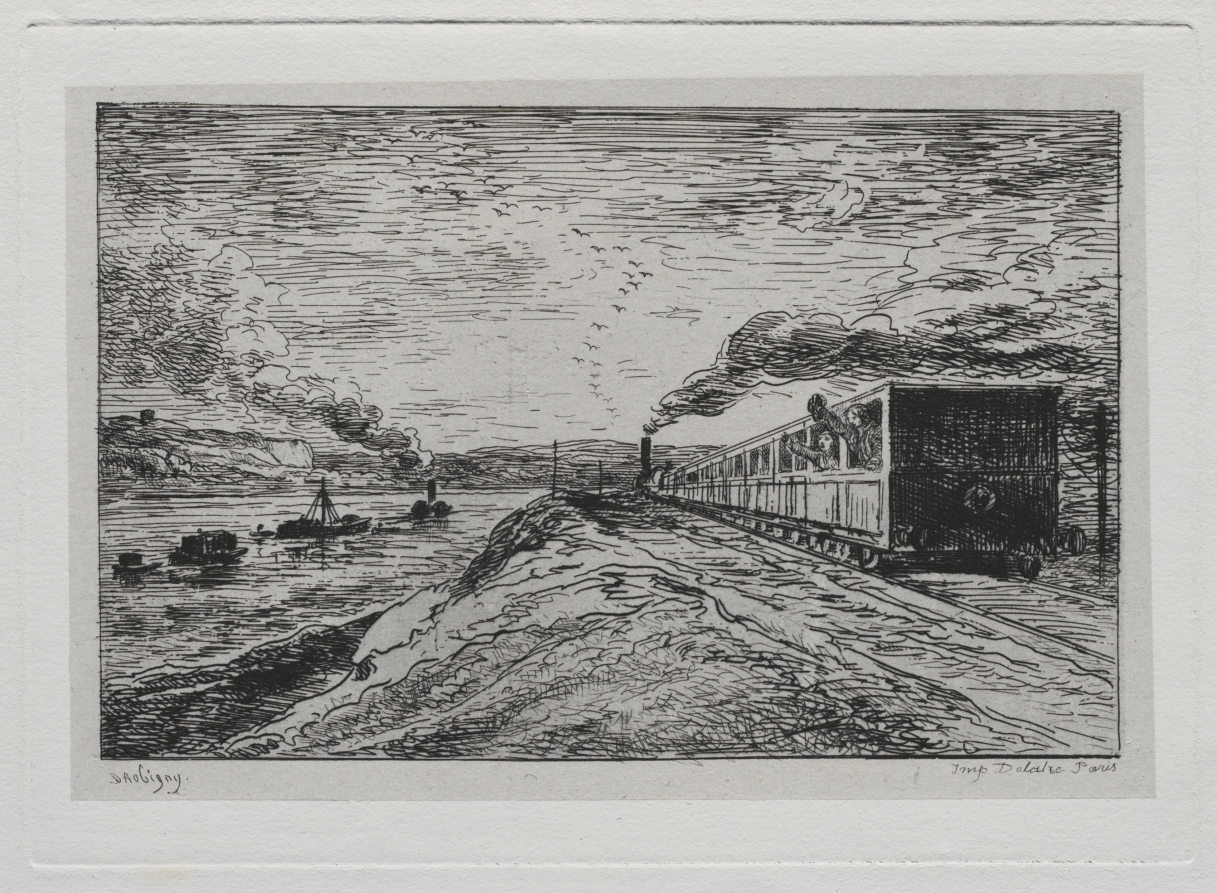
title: The Boat Trip: The Departure (The Return)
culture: France, 19th century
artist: Charles François Daubigny (French, 1817–1878)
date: 1861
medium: etching with chine collé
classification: Portfolio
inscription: lower left corner, in graphite: L. D. 115